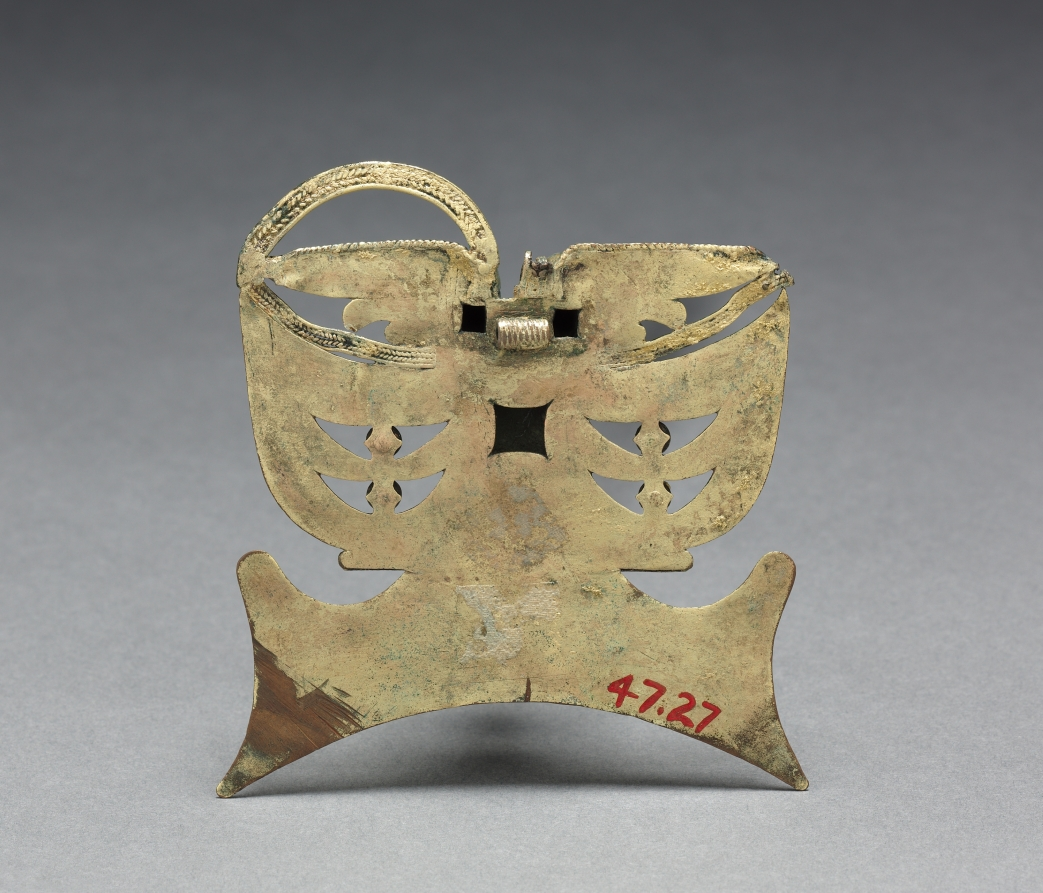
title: Human Effigy Pendant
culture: after the Tairona style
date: before 1947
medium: copper, gold, mercury, traces of iron and silver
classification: Metalwork